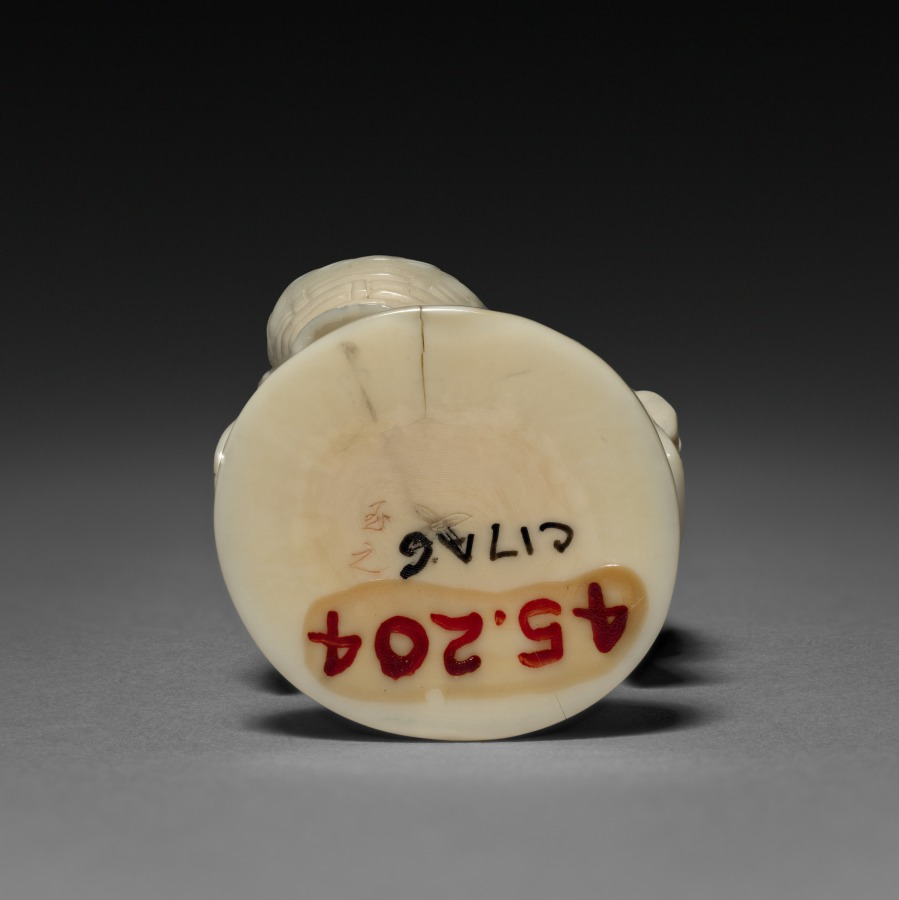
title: Woman Carrying a Basket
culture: Japan, Meiji period (1868–1912)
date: early 1900s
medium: ivory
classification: Ivory